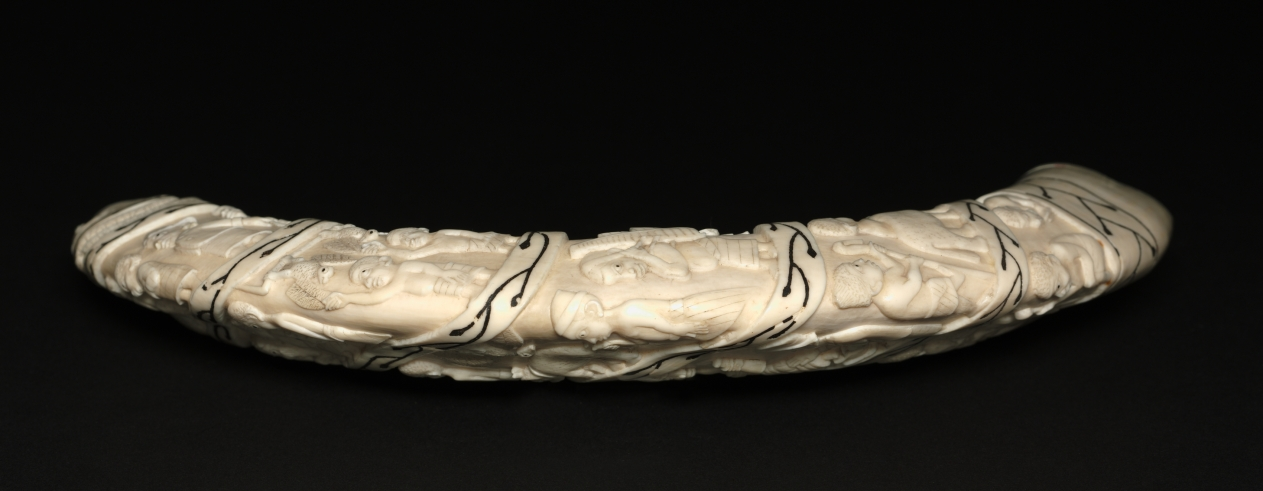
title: Carved Tooth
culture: Africa, Central Africa, Democratic Republic of Congo, Cabinda, or Republic of the Congo, probably Vili-style maker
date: late 1800s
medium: Hippopotamus ivory and organic material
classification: Sculpture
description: This is a fine example of art produced for sale to European visitors in the Lower Congo River area. A long history of cultural and artistic interactions between Africans and Europeans began in 1482, when the Portuguese first established diplomatic ties with the rulers of the Kongo kingdoms. Note the image of a foreign merchant pouring whiskey from a keg.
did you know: Spiral motifs have been found on Kongo Kingdom ivory carvings since at least the 1500s.